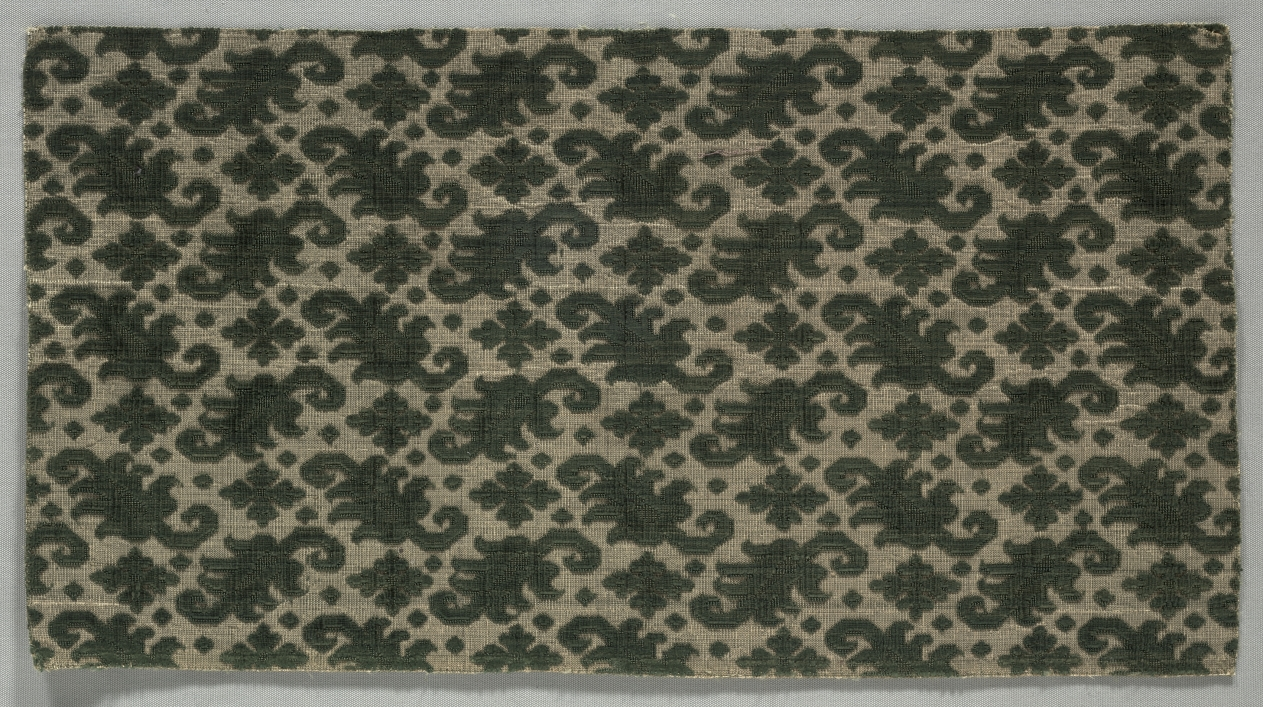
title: Velvet Fragment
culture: Italy, first third of 17th century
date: 1600–1740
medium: velvet (cut and uncut); silk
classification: Velvet